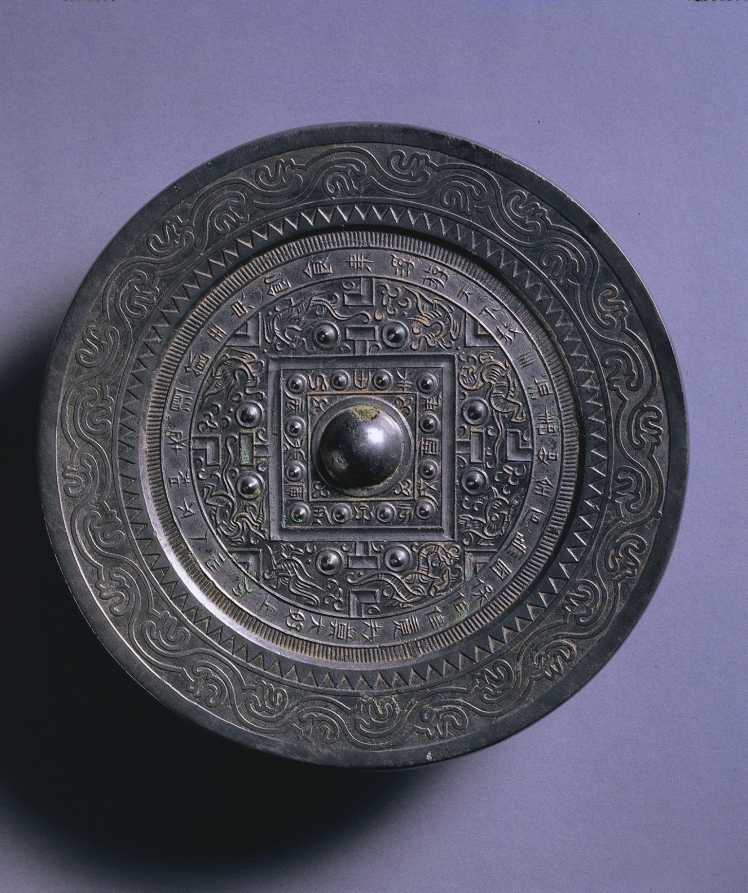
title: TLV Mirror with Multiple Nipples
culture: China, Xin dynasty (9–23 CE)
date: 9–23 CE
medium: bronze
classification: Metalwork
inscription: 作佳鏡哉真大好，上有仙人不知老。 渴飲玉泉飢食棗，浮遊天下傲四海。 壽如金石為國保。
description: The inscription in this mirror reads: A fine mirror it is, my making of it! I can show the ageless immortals up above. They wander over the earth and belittle the Four Oceans. They live as long as metal and stone, And are true protectors of our kingdom. These poetic lines suggest the reflective and magical qualities of the bronze mirror in the Chinese imagination. Besides reflecting the immortals, it illuminated the human soul so that it would be in tune with forces of yin and yang in Chinese cosmology.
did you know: This mirror includes a poetic inscription that credits the immortals as protectors of the kingdom.